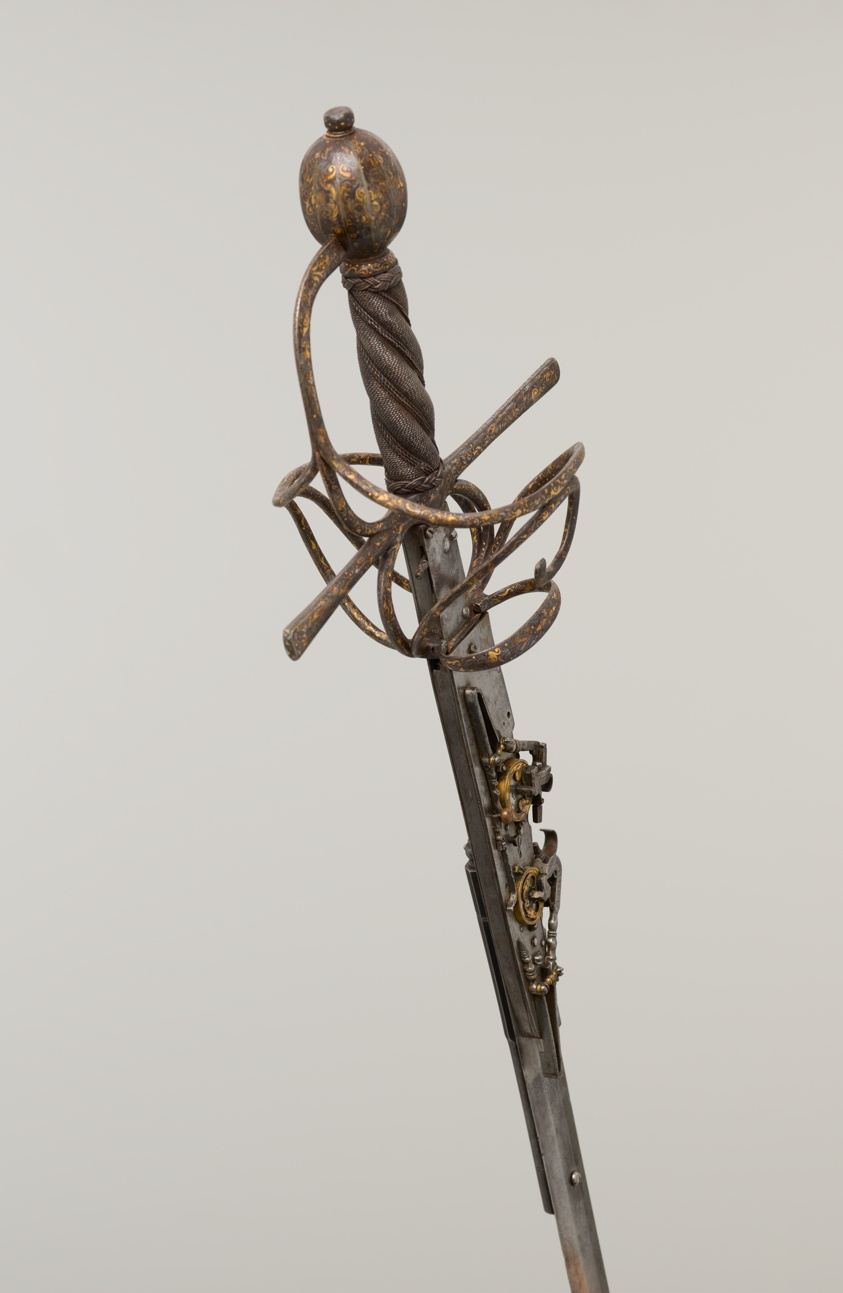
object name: Arms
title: Rapier Combined with two Wheel-Lock Pistols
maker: German; Bladesmith: Hernandez Sebastian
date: c. 1600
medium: Steel, iron, brass, gold, silver, gilding, and wood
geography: Germany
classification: combination weapon; arms; arms and armor